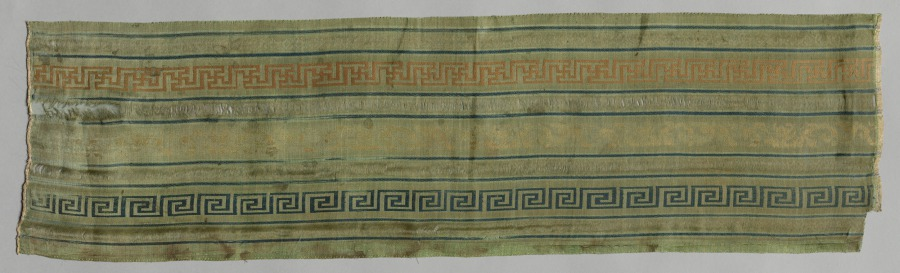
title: Fragment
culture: China, 19th century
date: 1800s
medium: silk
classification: Textile